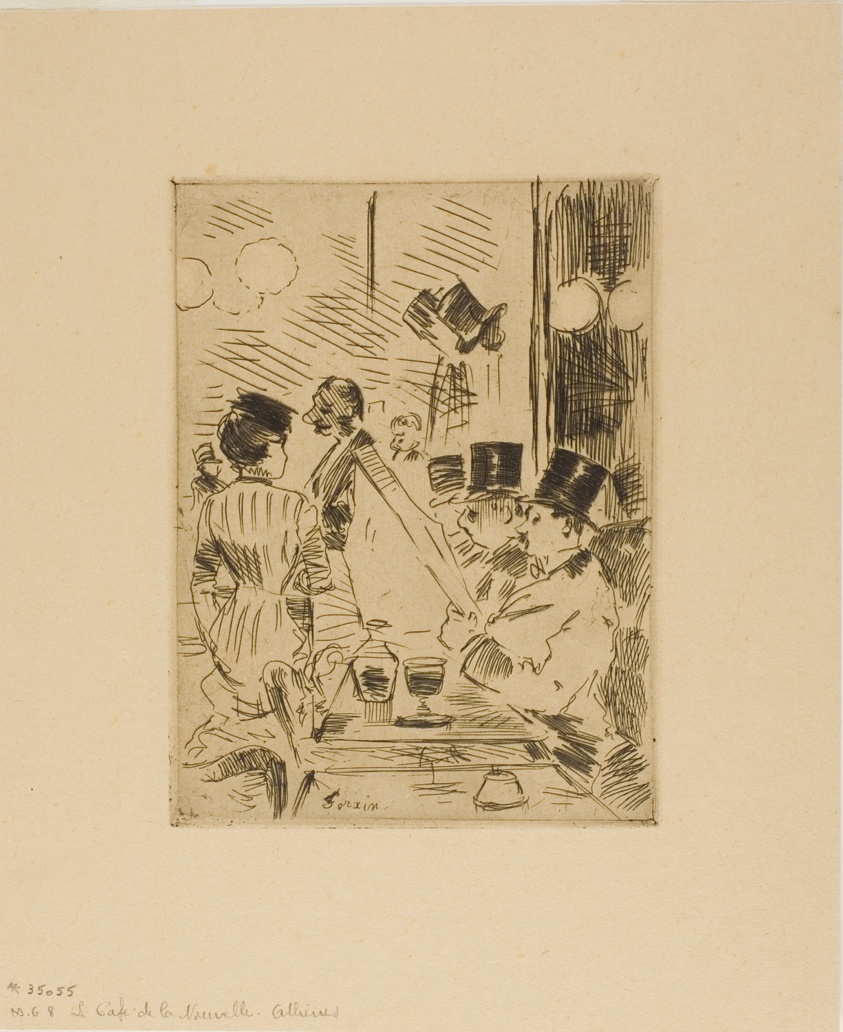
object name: Print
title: The Café of the New Athens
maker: Jean Louis Forain (French, 1852-1931)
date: c. 1876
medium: Etching on tan wove paper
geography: France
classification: etching; print; prints and drawing